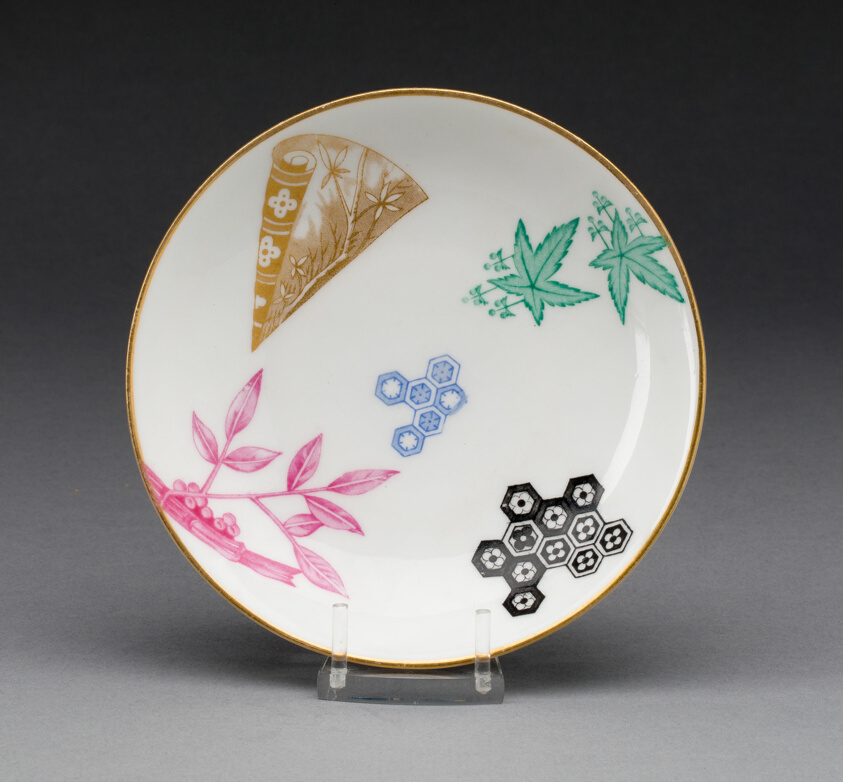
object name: Ceramics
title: Saucer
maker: Worcester Porcelain Factory (Worcester Royal Porcelain Company, 1862-1958); Worcester, England, founded 1751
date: 1878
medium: Soft-paste porcelain, polychrome enamels and gilding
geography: Worcester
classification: ceramics; teaware; porcelain; european decorative arts